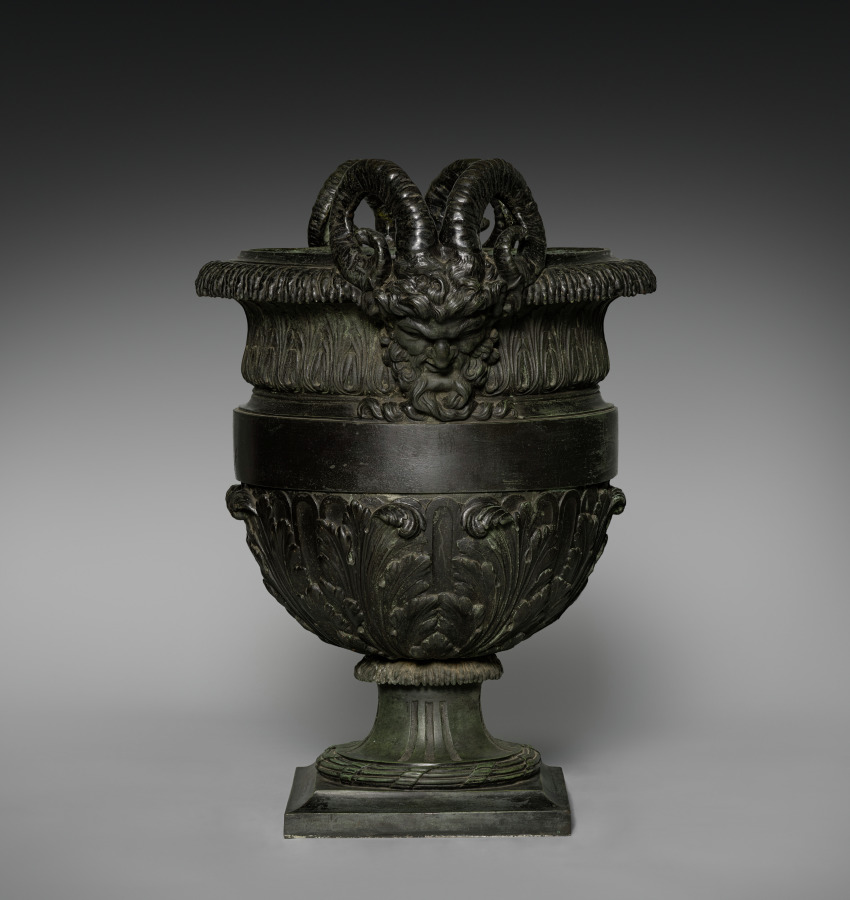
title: Urn with Satyr Heads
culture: France, 18th century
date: 1700s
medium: bronze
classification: Metalwork